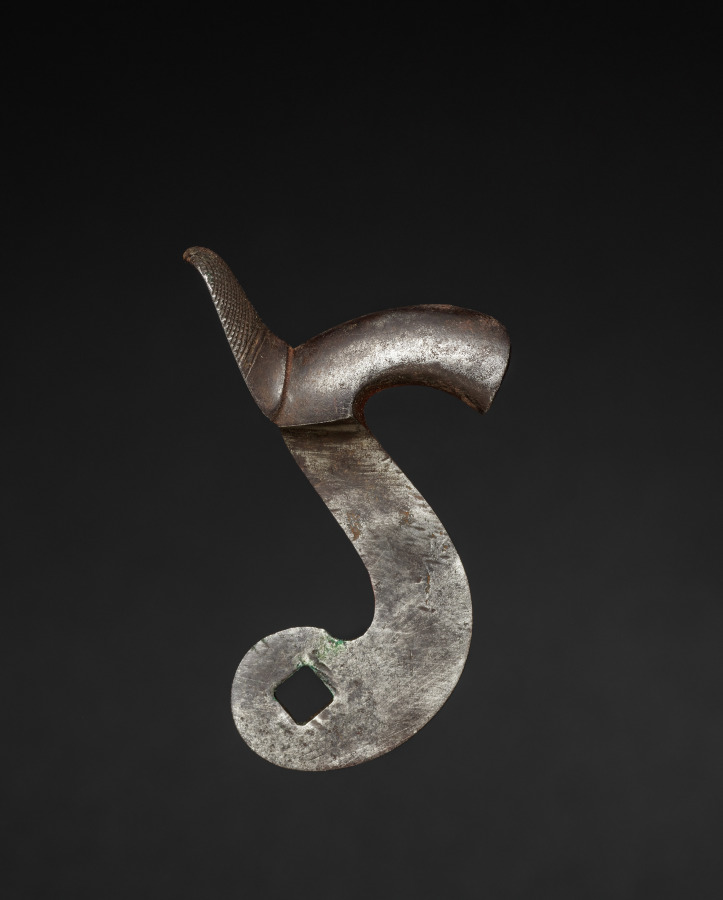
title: Gun-Lock Hammer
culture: England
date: c. 1800–1825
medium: steel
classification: Arms and Armor